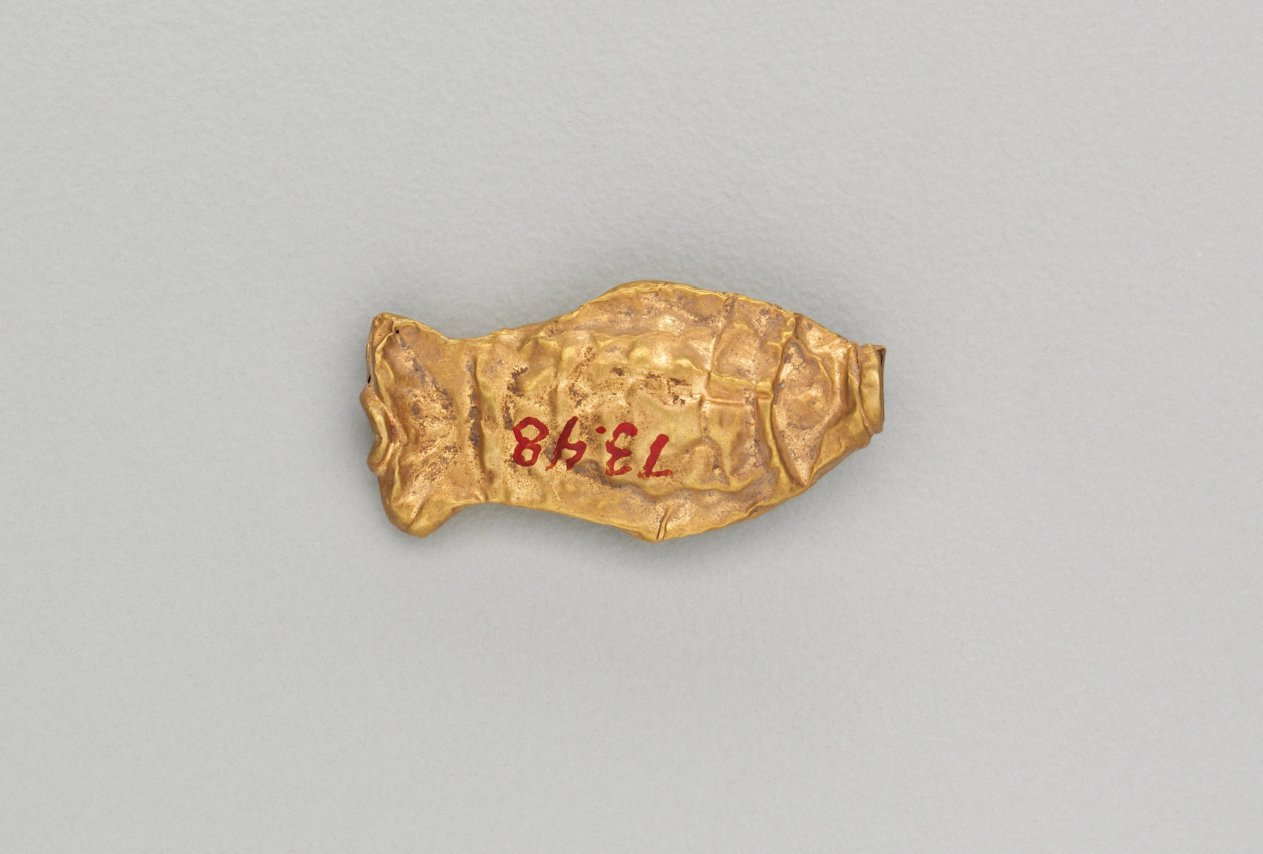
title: Necklace Bead in the Form of a Fish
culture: India, Shunga period (185–78 BCE)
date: 185–72 BCE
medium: gold repoussé with granulation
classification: Jewelry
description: Jewelry in ancient India often consisted of elements associated with water, such as fish and other aquatic plants and animals. Since water is essential for life, imagery that connotes water is life-affirming, or auspicious, and therefore appropriate adornment.